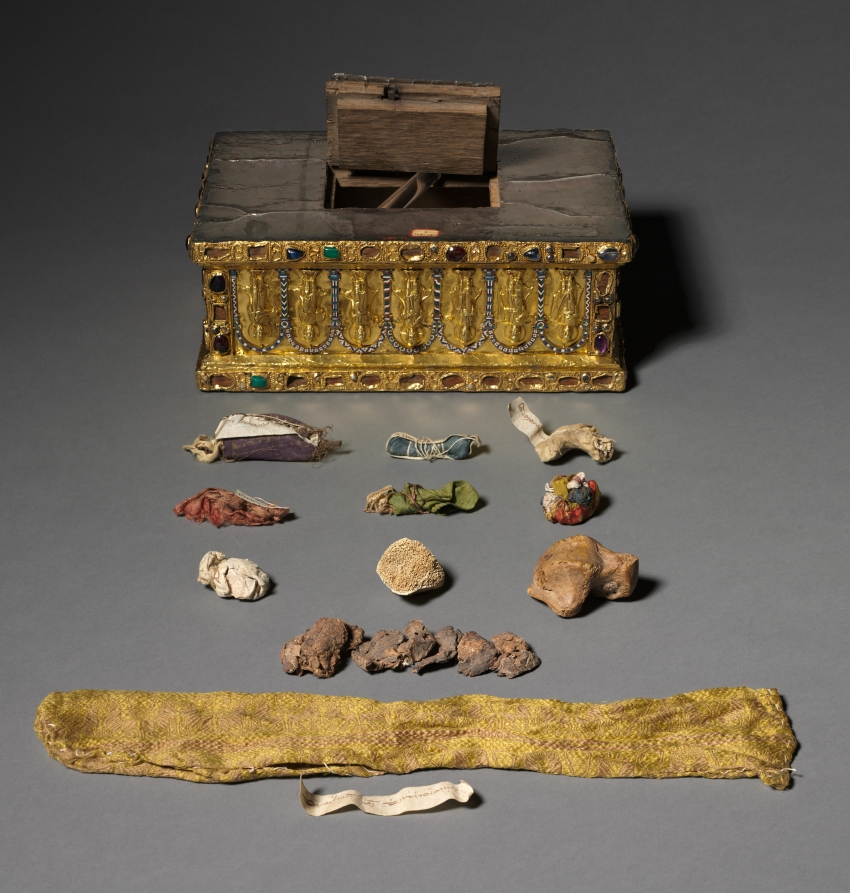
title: Portable Altar of Countess Gertrude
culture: Germany, Lower Saxony?, Romanesque period, 11th century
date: c. 1045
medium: gold, cloisonné enamel, porphyry, gems, pearls, niello, wood core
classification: Metalwork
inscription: GERDRVDIS XPO FELIX VT | VIVAT IN IPSO OBTVLIT HVNC LAPIDEM GEMMIS | AVROQ NITENTEM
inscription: SIGISMVNDVS, CONSTANTIVS, SANCTA CRVX, SCA ELENA, SCA ADALHEIT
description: Commissioned by Countess Gertrude of Brunswick, this portable altar is one of the Guelph Treasure’s earliest and most sumptuous objects. The choice of white-speckled porphyry as the altar stone signals Gertrude’s worldly aspirations; an imperial color since classical antiquity, porphyry was only used by the imperial family. Historical figures of royal and imperial rank are depicted with Christ, the Virgin, apostles, and archangels along the altar’s sides, stressing the countess’s political ambitions and claim of imperial lineage for her own dynasty. The Latin inscription surrounding the altar stone reads, "Gertrude offers to Christ, to live joyfully in him, this stone that glistens with gems and gold."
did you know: On the bottom of this altar is a trap door that opened to reveal small relics of saints wrapped in silk.